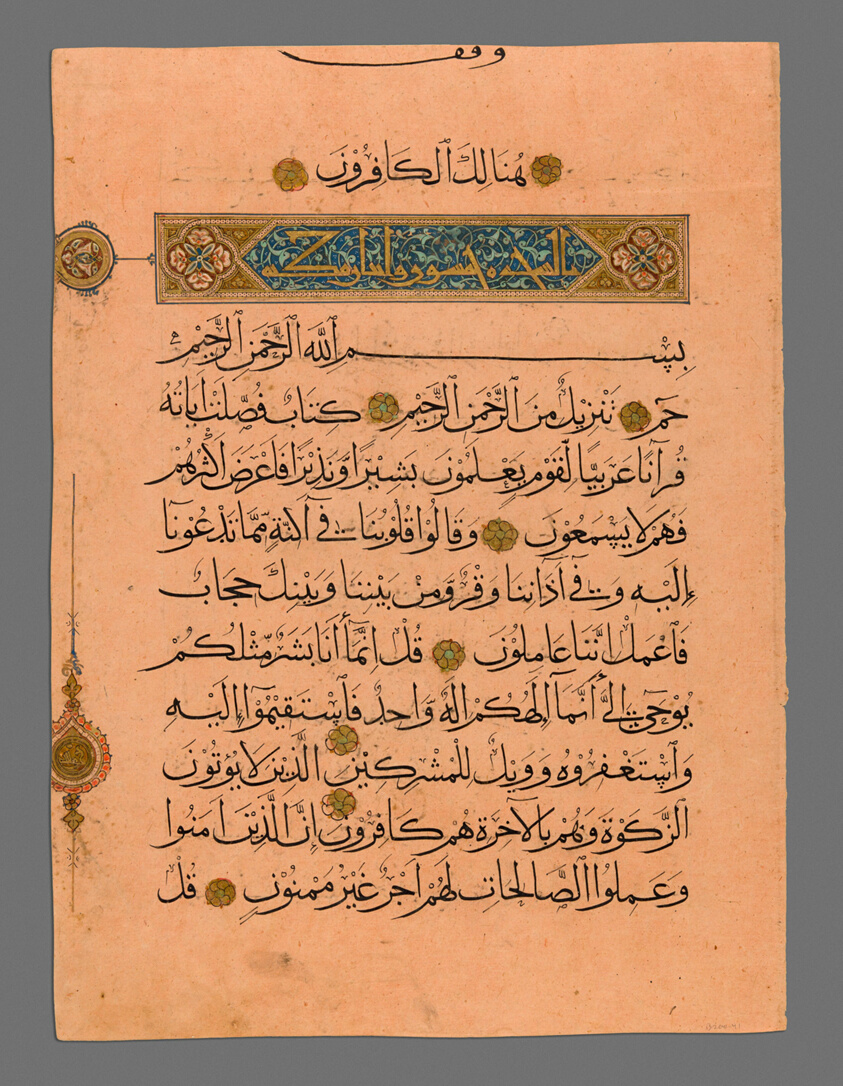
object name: Drawing and Watercolor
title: Qur'an leaf in Muhaqqaq script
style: Islamic (culture or style)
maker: Egypt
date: Mamluk period, c. A.H. 728 / A.D. 1327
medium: Opaque watercolor, gold and ink on paper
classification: watercolor